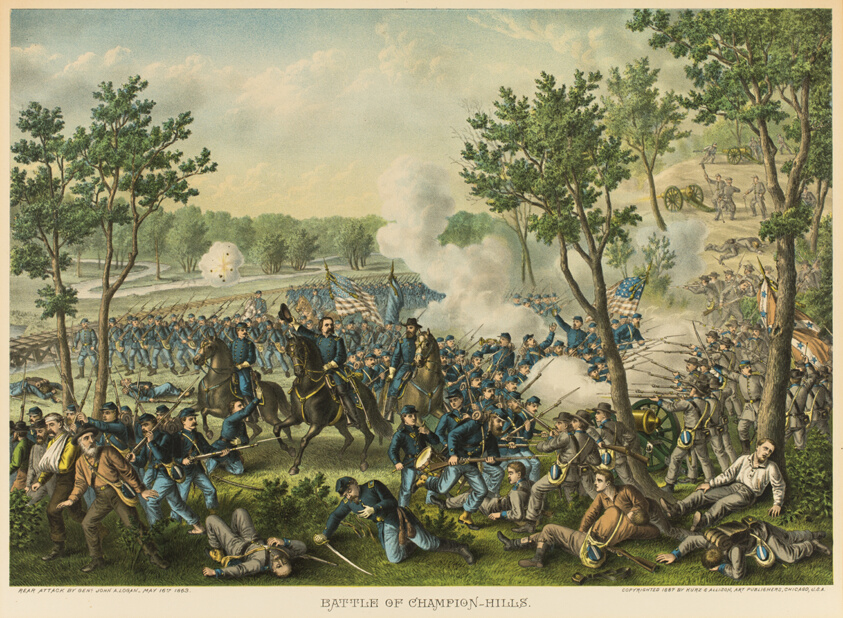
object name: Print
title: The Battle of Champion Hills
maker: Unknown Artist; published by Kurz and Allison (American, founded in Chicago, 1880)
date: 1887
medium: Color lithograph on off-white wove paper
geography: United States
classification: lithograph; print; prints and drawing